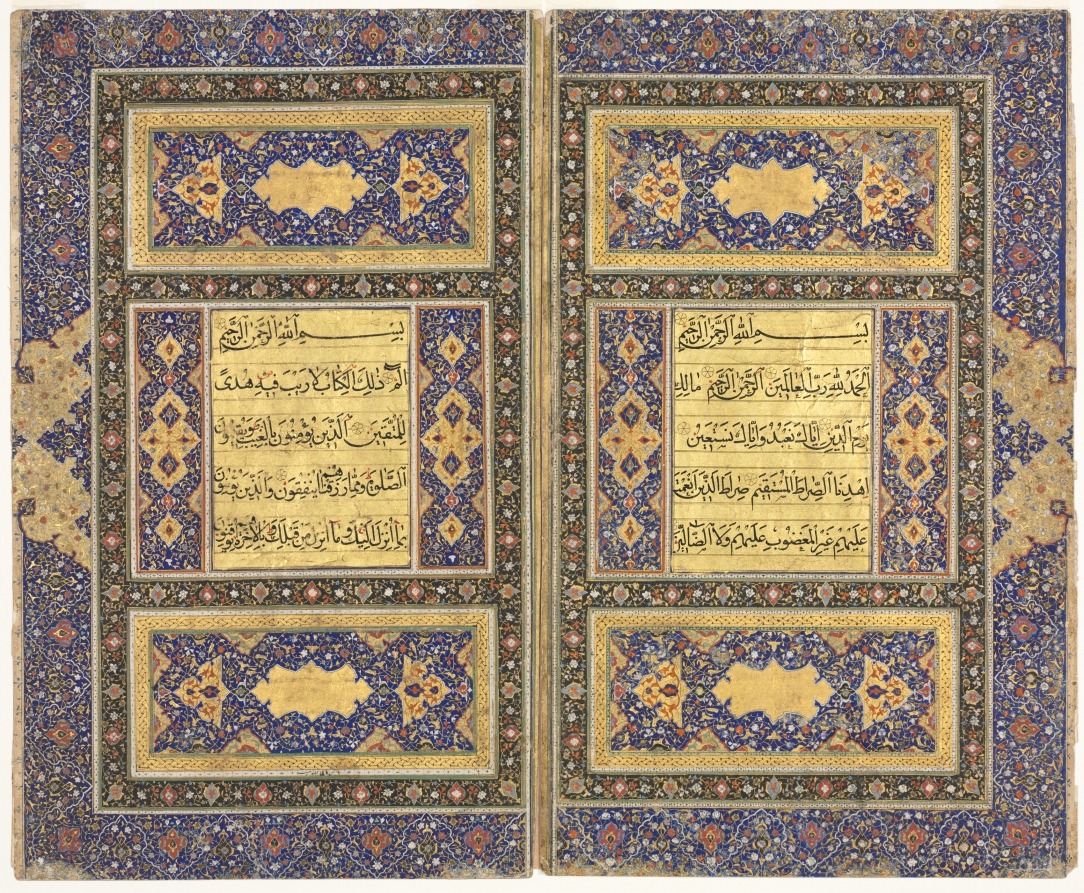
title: Qur'an Manuscript Folio (Recto); Left Folio of Double-Page Illuminated Frontispiece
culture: Afghanistan, Herat, Safavid period (1501–1722)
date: 1500s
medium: ink, gold, and colors on paper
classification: Manuscript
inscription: Translation: Surah I: 1-7: In the Name of God, the Merciful, the Compassionate. Praise belongs to God, the Lord of all Being, the All merciful, the All-compassionate, the Master of the Day of Doom Thee only do we serve; to Thee alone do we pray for succour. Guide us in the straight path, the path of those whom Thou has blessed, not of those against whom Thou art wrathful, nor of those who are astray. Left folio (Surah II, 1-4) In the Name of God, the Merciful, the Compassionate. Alif Lam Mim That is the book, wherein is no doubt, a guidance to the godfearing who believe in the Unseen, and perform the prayer, and expend of that We have provided them; who believe in what has been sent down to thee and that had been sent down before thee, and have faith in the Hereafter; those are upon guidance from their Lord, those are the ones who prosper. Sura-al-Baqara [Chapter:The Cow] 2:1-4 (Arabic) Script: Naskhi (five lines to a page) Written in a very tiny hand, in the center of the white border that surrounds the lower rectangle, is the signature of the illuminator. The inscription is damaged, so that the name is illegible. Ir reads: amala [illegible] al-muzahib (the work of [illegible] the illuminator).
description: The Qur'an is the sacred book of Islam. In the view of orthodox Muslims, it is the literal word of God as revealed to the Prophet Muhammad (d. 632) in the Arabic language, and thus, recorded in the Arabic script. Because of its association with the divine word, Arabic calligraphy came to be a supreme art form in the Islamic world. As the quintessential symbol of the culture, it became a pervasive decorative element in Islamic art and architecture. Although secondary to calligraphy, a tradition of illumination—that is, ornamentation with colors and gold—developed to enhance the pages of the Qur'an. Because of the prestige associated with the book arts in the Islamic world, the decorative motifs employed by illuminators (scrolling vines, blossoms, lozenges, and cartouches) found their way into other art forms, for example, metalwork, textiles, and carpets.